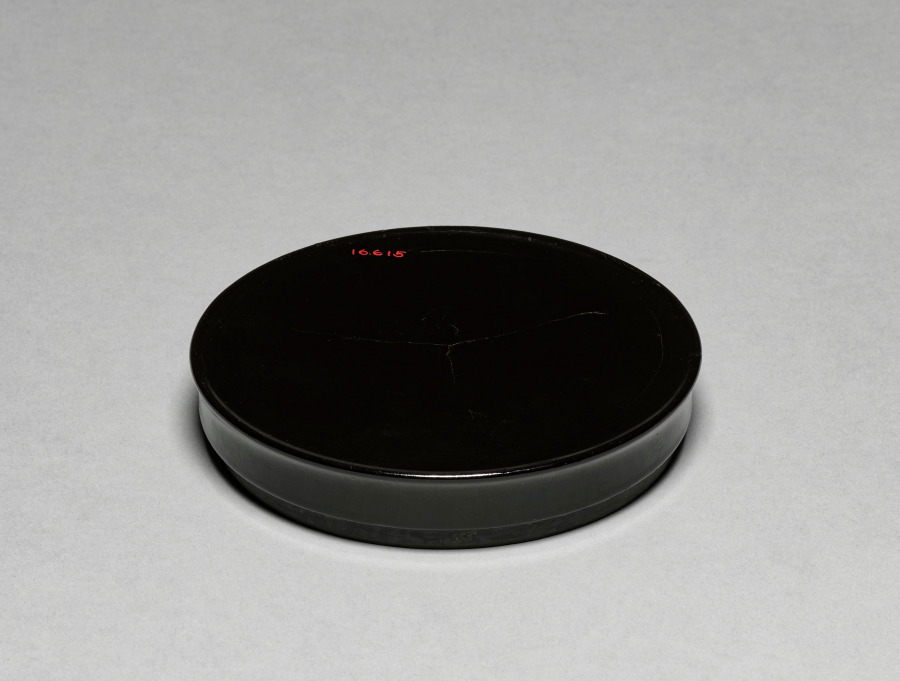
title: Box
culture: Germany, late 18th Century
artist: possibly studio or workshop of Johann Heinrich Stobwasser (German, 1740–1829)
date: late 1700s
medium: lacquered wood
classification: Miscellaneous